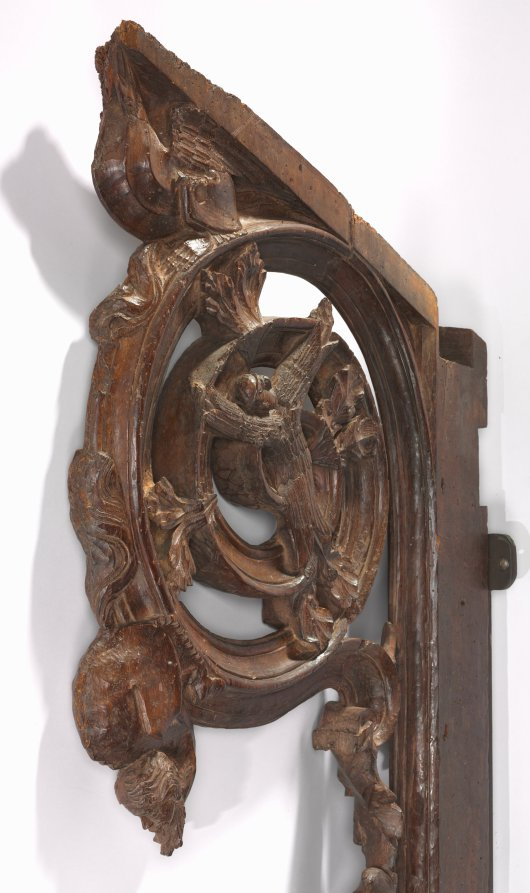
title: Panel from a Choir Stall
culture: Spain, Catalonia, Monastery of Pedralbes, 14th century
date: c. 1330–1340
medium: walnut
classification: Furniture and woodwork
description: The large panel shown here was probably the end panel of a stall that faced another across the choir of a Gothic church. The panel is carved with the figure of St. Francis of Assisi kneeling in prayer and receiving the stigmata. Two standing figures also appear on this panel: a nun at the left (perhaps St. Claire) and a female martyr at the right. Below is St. Michael and the dragon.